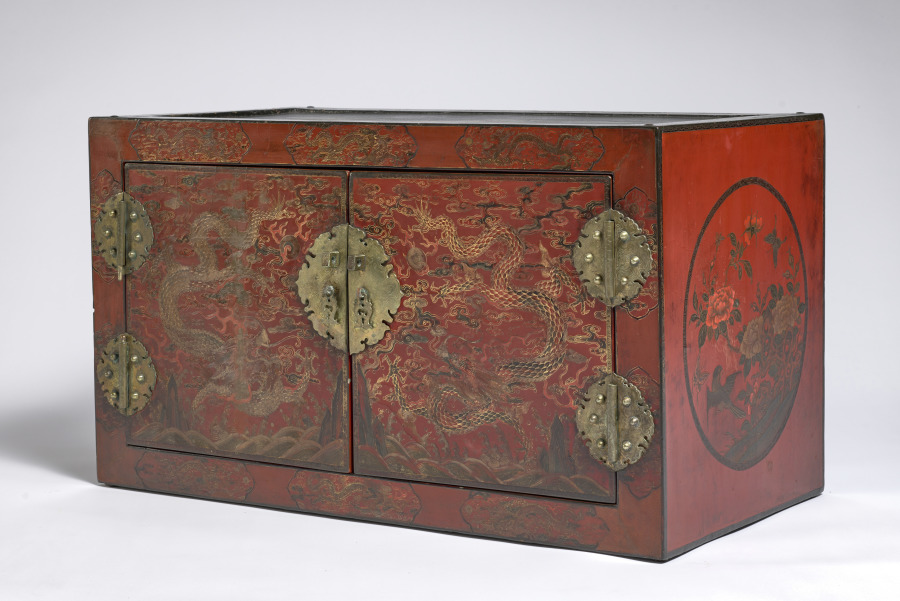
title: Top Chest of a Double Cabinet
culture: China, Ming dynasty (1368-1644) - Qing dynasty (1644-1911)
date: 1600s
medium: red lacquer on wood with pigment and gilding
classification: Furniture and woodwork